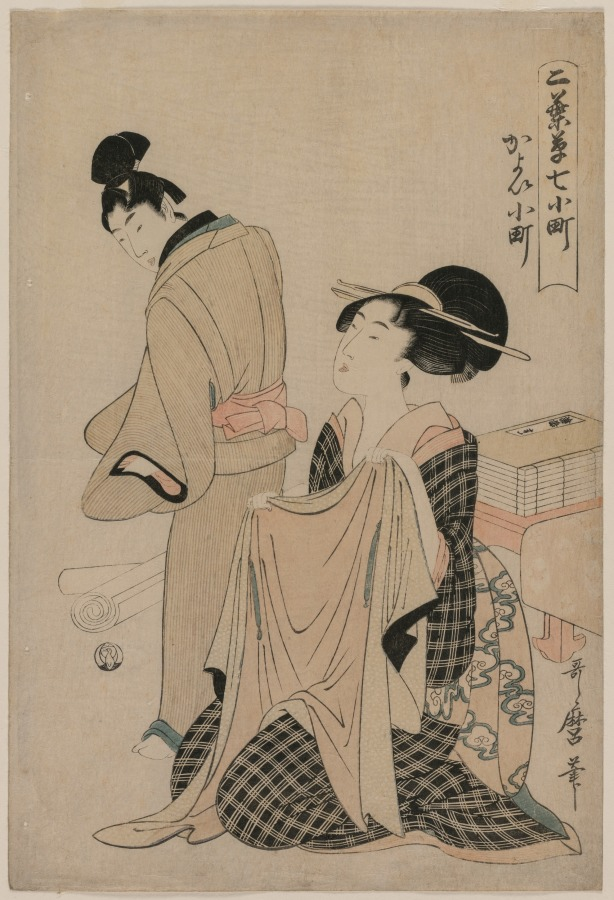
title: Seven Komachi Episodes: A Woman Holding an Outer Garment for a Man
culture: Japan, Edo period (1615–1868)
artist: Kitagawa Utamaro (Japanese, c. 1754–1806)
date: 1754–1806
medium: color woodblock print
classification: Print